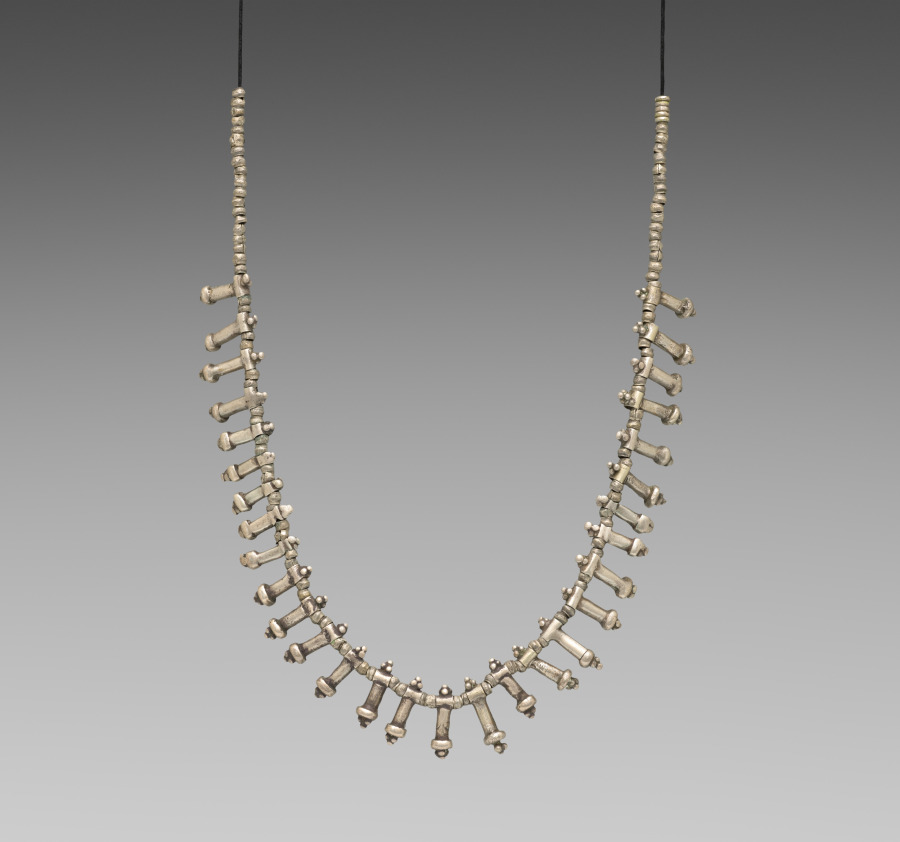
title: Necklace with beads (sadi?)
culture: Africa, East Africa, Ethiopia, unknown silversmith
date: late 1800s or early 1900s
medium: silver alloy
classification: Jewelry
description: This necklace has an abundance of phallic beads representing fertility framed by dozens of smaller silver beads. Specialists in gold and silver would melt silver into small balls that were then attached to drawn rods of metal. Atop each bead is a pile of small granulations; these tiny metal spheres are small like pieces of grain.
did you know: There are no local sources of silver in Ethiopia.